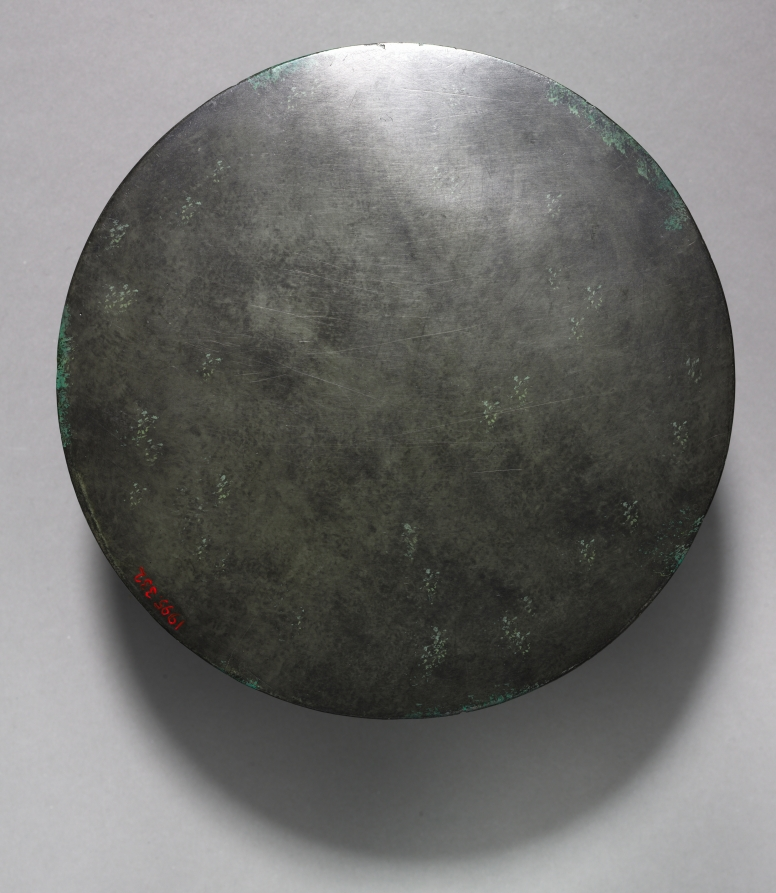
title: Mirror with Deities, Chariot, and the White Tiger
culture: China, Eastern Han dynasty (25–220 CE)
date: 100–200 CE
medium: bronze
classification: Metalwork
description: Depicted on the mirror back are two Daoist deities: the King Father of the East (Dongwanggong) and the Queen Mother of the West (Xiwangmu). Completing the design are the White Tiger of the west (one the Four Spirits representing the four cardinal directions, including the Green Dragon of the east, the Red Bird of the south, and the Dark Warrior of the north) and a chariot drawn by three horses. The reason for the redundancy of two symbolic images relating to the west is not known.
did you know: The meaning of the complex imagery on this mirror's back is not fully understood.